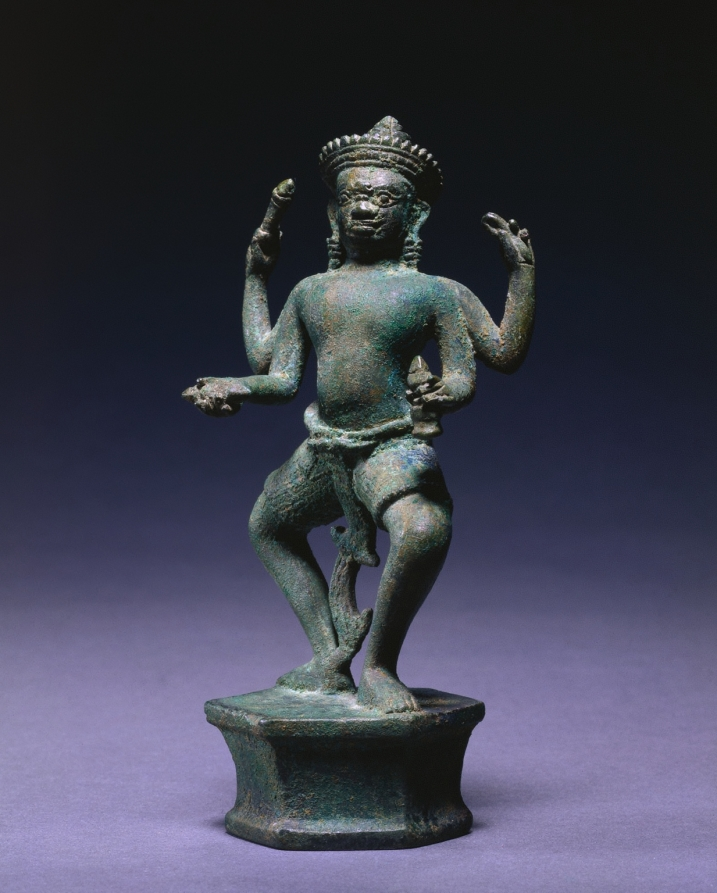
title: Four-Armed Standing Tantric Male Divinity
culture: Cambodia, Koh Ker/Khleang style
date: 925–75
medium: bronze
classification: Sculpture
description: In his four hands, the male tantric deity holds a noose, bell, vajra, and club.